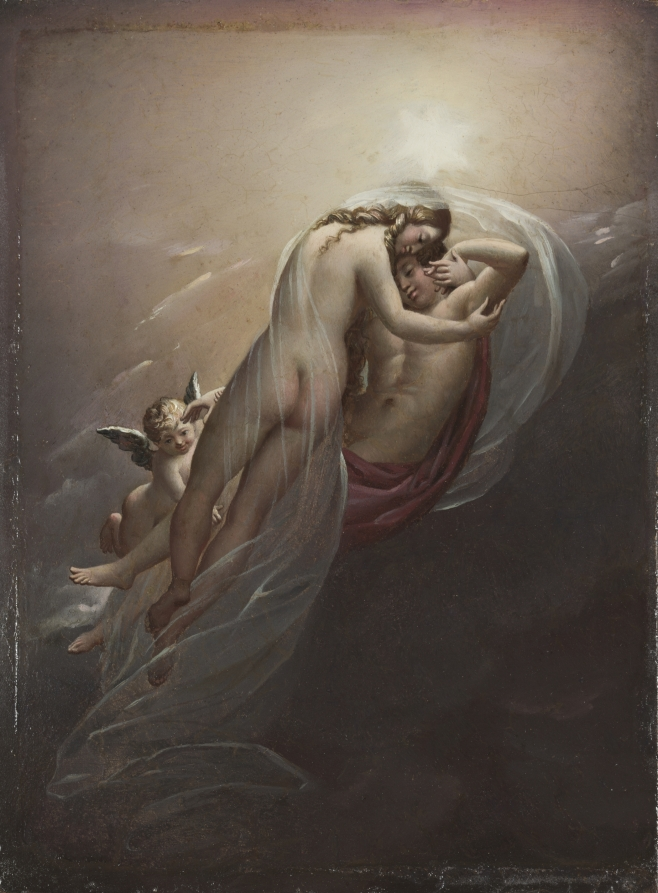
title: Aurora and Cephalus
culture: France, 19th century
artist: Anne-Louis Girodet de Roucy-Trioson (French, 1767–1824)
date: c.1810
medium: oil on canvas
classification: Painting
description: The goddess of the dawn, Aurora, fell in love with the shepherd Cephalus. She eventually seized him at daybreak, bringing him to the heavens while he slept—the scene Girodet has painted here. Later, missing his wife, Procris, Cephalus begs to return. Aurora agrees, giving him a magic spear that kills every target, including his wife, when he mistakes her for an animal in the brush.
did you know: This myth subverts typical gender dynamics: usually a man captures a woman, but in this story the trope reversed.